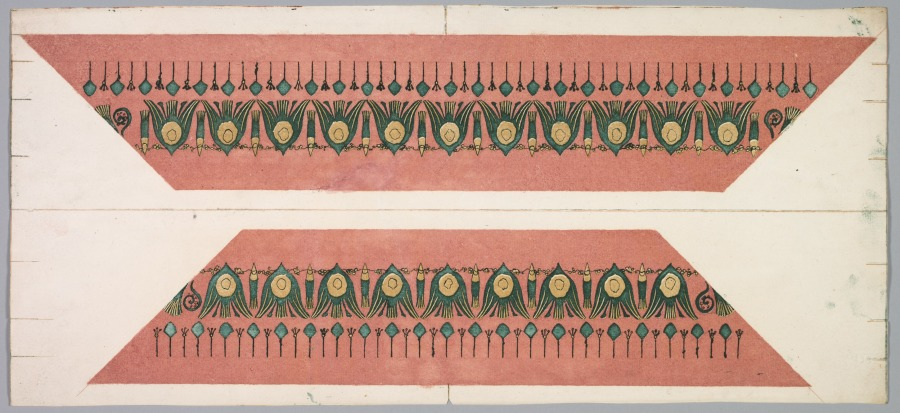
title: Embers Glow: Lotus Pattern Frame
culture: France, 19th century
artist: Theodore Roussel (French, 1847–1926)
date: 1897–1899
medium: color etching and aquatint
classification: Print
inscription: verso, in graphite: R-7h-R